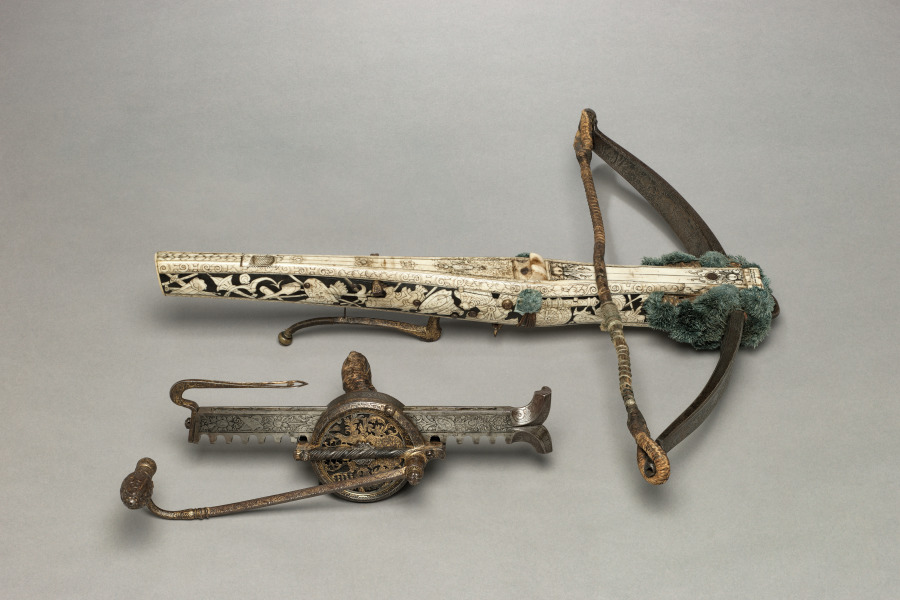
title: Crossbow and Cranequin of Elector Augustus I of Saxony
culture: Germany, Saxony, 16th century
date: c. 1553–73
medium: wood (walnut?), bone veneers, flax cord, steel (etched, traces of gilding). woolen pompoms, stock decorated wih inlaid trophies of arms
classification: Arms and Armor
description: This crossbow was a hunting weapon for Prince Elector Augustus I, a member of the ruling elite in the Holy Roman Empire. Augustus, powerful and wealthy, had even the most practical instruments ornately decorated, including this crossbow and its cranequin, or winding device.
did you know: Augustus was a marksman who took part in crossbow competitions. He had a large collection and often gave them to friends.